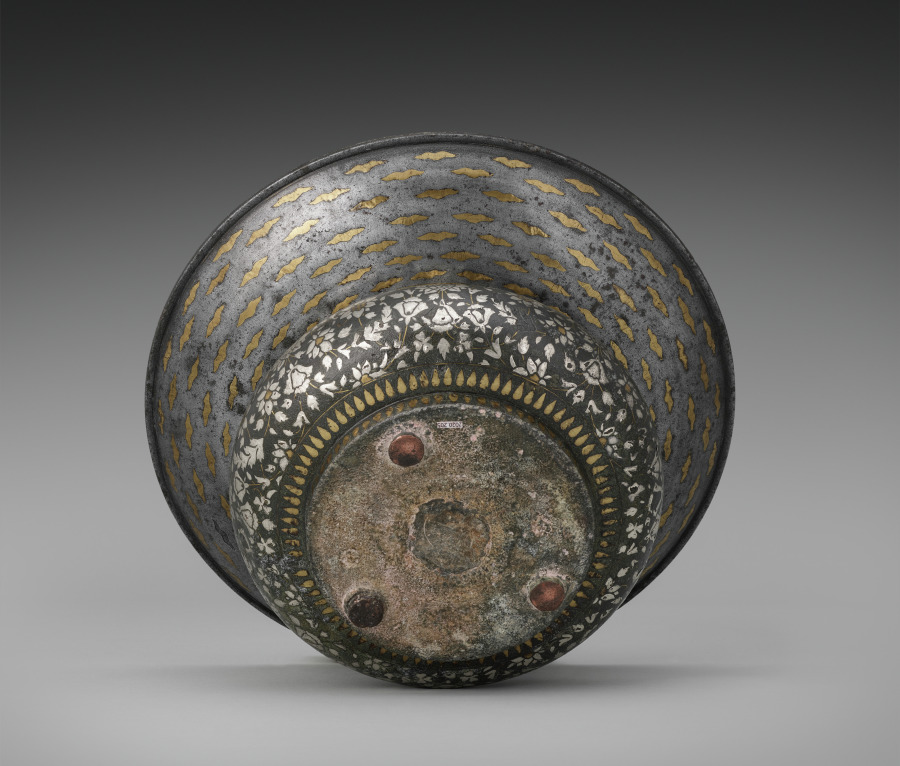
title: Bidri Basin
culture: Southwestern India, Deccan, Karnataka, Bidar​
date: c. 1650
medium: Zinc alloy with silver and brass inlay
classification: Metalwork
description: Wide-rimmed basins called sailabchi were used to catch water poured from a pitcher during hand washing before prayer and before and after meals. A sumptuous example such as this was made for an elite setting. Every element of the allover floral arabesque was cut from silver and brass sheets or wire and hammered into the cast zinc alloy vessel in a distinctive technique developed in southern India.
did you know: Zinc alloy does not rust or corrode, in contrast to steel or copper alloys.